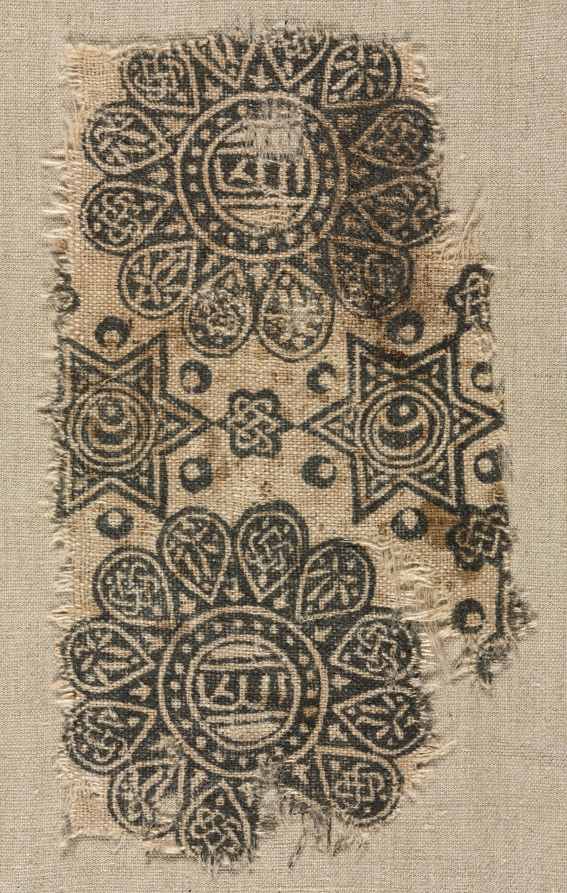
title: Fragment of a Woodblock Print on Linen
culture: Mamluk Sultanate (Egypt)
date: 1200s–1300s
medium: pigment, linen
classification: Textile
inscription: al-sultan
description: Egypt remained an active hub of textile production and trade under the rule of the Mamluk Sultanate (1250–1517), a Muslim dynasty. In the block-print technology used on this textile, multiple carved wooden blocks impress patterns on cotton or linen fabrics. Artisans used separate blocks to transfer the round medallions, create the stars, and apply the interlocking motif at the fragment’s center. The inner medallion inscription reads “the sultan” in an abbreviated Arabic spelling. Block-printed textiles were in high demand around the Mediterranean and Red Sea regions, with many produced in Egypt and others imported from western India.